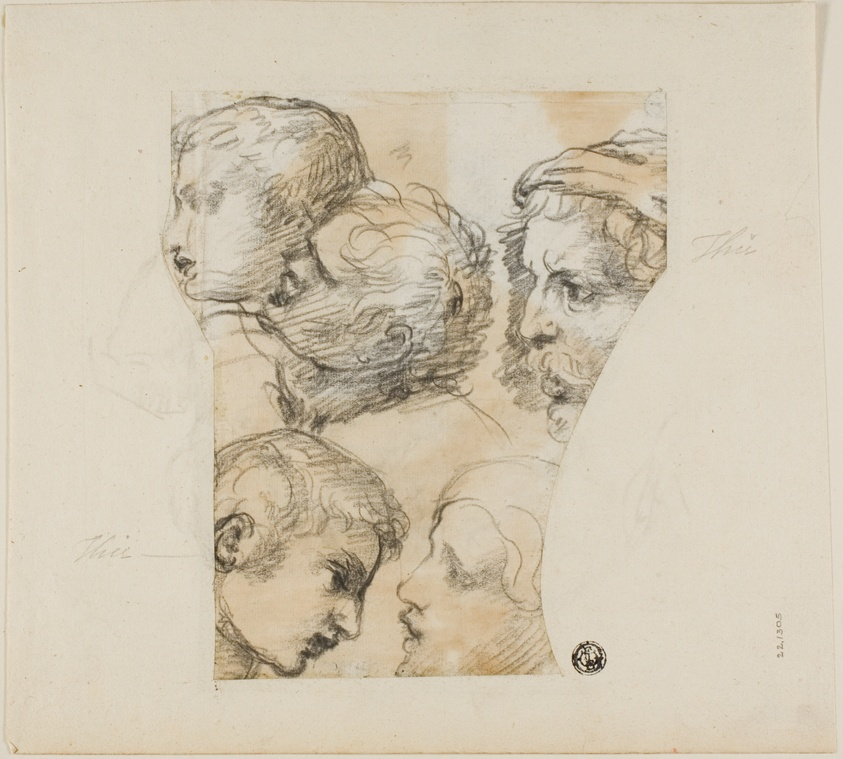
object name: Drawing and Watercolor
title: Sketches of Male Heads (recto); Two Old Women (verso)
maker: Thomas Patch (English, 1725-1782); or Inigo Jones (English, 1573-1652)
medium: Black chalk (recto and verso) on ivory laid paper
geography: England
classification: chalk; drawings (visual works); prints and drawing